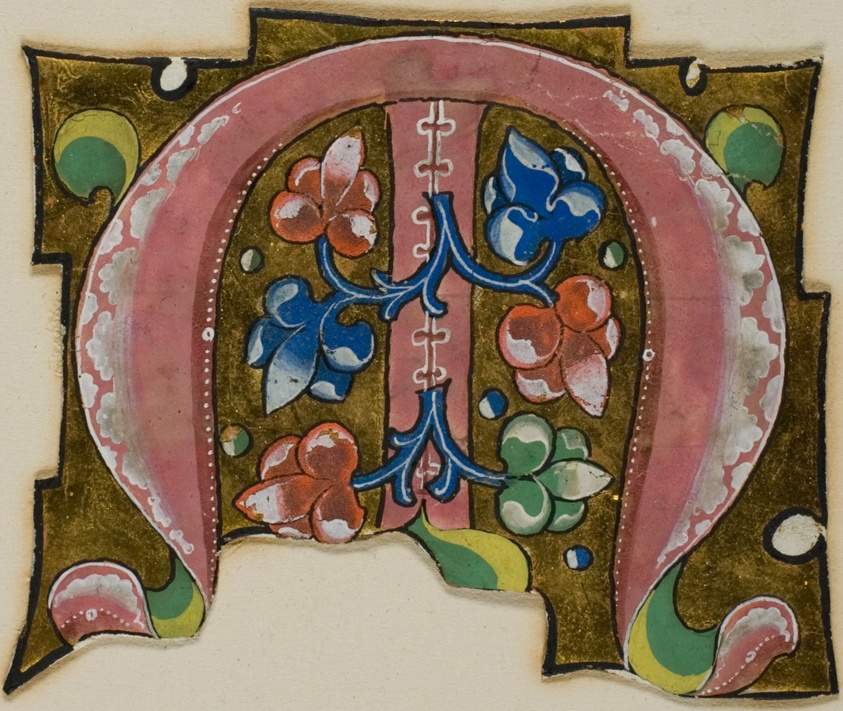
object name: Drawing and Watercolor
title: Decorated Initial "M" in Pink with Conventional Leaves from a Choir Book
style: medieval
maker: European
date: 14th century or modern, c. 1920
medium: Manuscript cutting in tempera and gold leaf on vellum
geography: Europe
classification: tempera; manuscript; drawings (visual works); prints and drawing